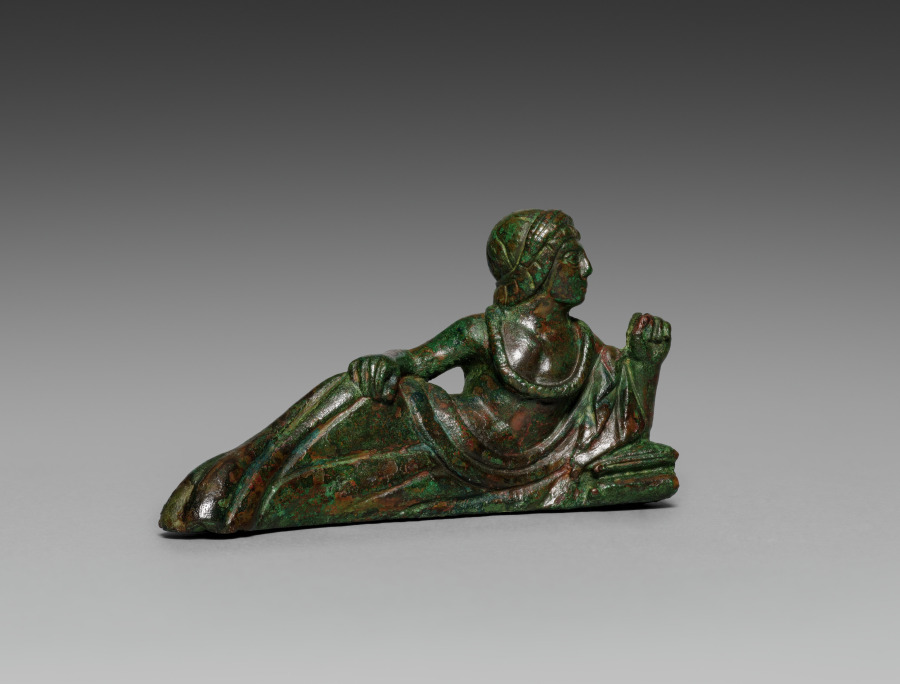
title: Vessel Ornament of Banqueter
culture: Etruscan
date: probably 400–375 BCE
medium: bronze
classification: Sculpture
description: This bronze banqueter figurine was one of six once adorning the rim of a large basin, now lost. Cast in molds with individualized details, most have grooves on their underside to attach to the basin. Minute traces of gilding remain on areas of clothing and skin (mostly visible only under magnification), suggesting that they may have been completely gilded. Two handles in the form of hippocampi, horses with serpentine tails, also belonged to the basin and are now displayed at the Michael C. Carlos Museum at Emory University. The basin may have been used to hold liquid for a banquet, or was perhaps funerary. This banqueter tilts his head toward his left hand, which may have once held an object, now lost. His right arm rests on his hip. Unlike the other banqueters, this figurine does not have exposed feet and his body curves slightly when viewed from above. This suggests that this figurine may have been made for a different initial use before being added to this set.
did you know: The Etruscan banquet shared similarities with the Greek symposium where guests reclined and drank wine.